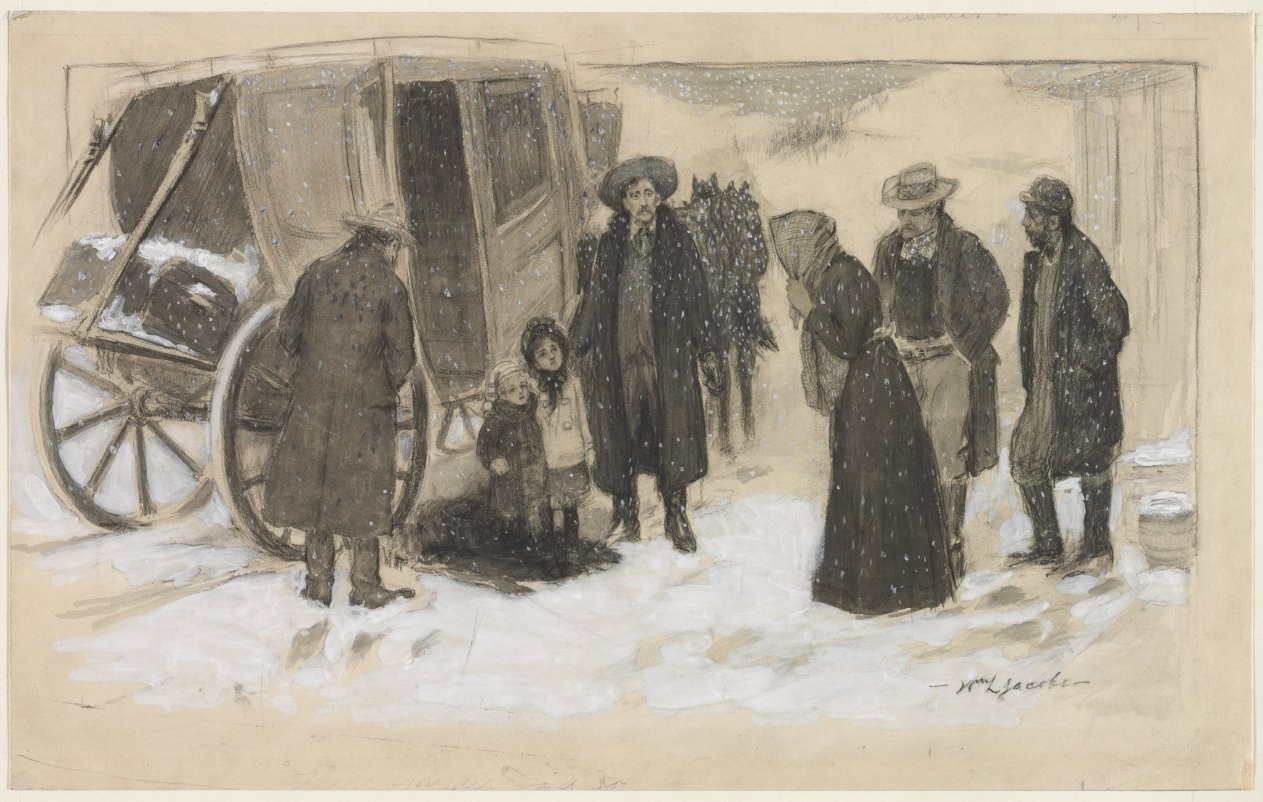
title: Sketch for "Christmas on the River"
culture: America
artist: William Leroy Jacobs (American, 1869–1917)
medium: watercolor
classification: Drawing